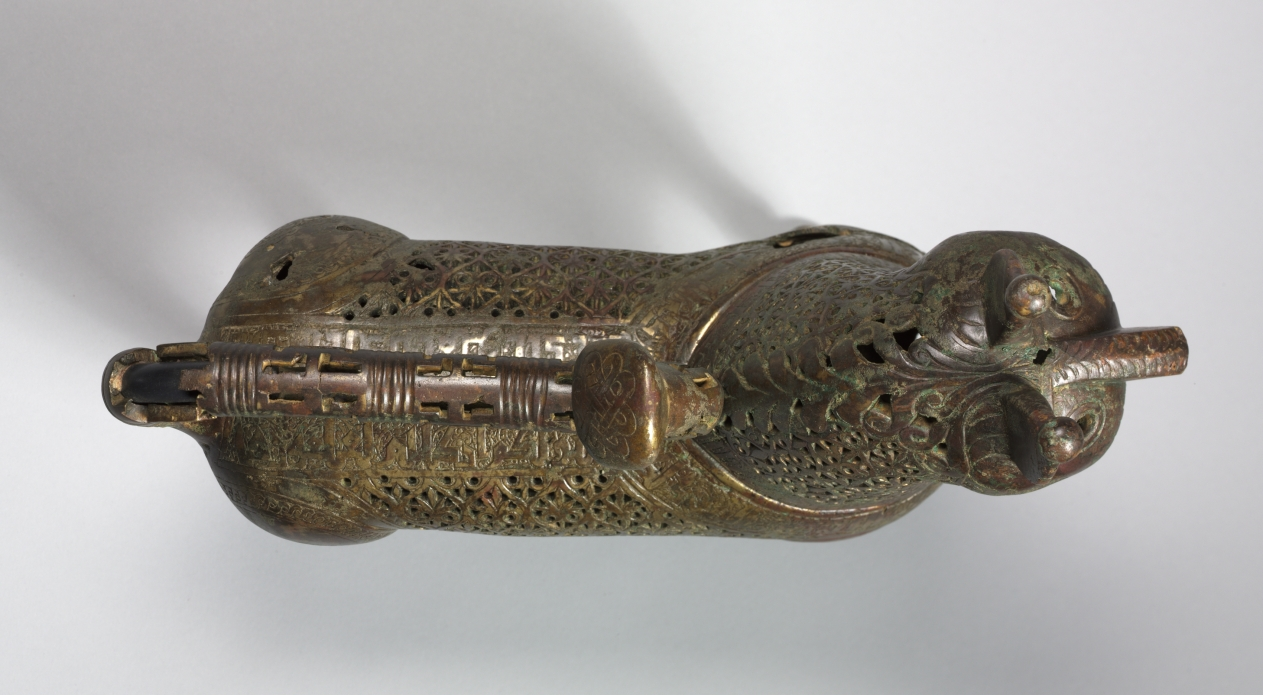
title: Feline Incense Burner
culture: Iran, Khurasan, Seljuq period of Iran (1037–1194)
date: 1150–1200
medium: Copper alloy, cast, engraved, chased, and pierced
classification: Metalwork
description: In Iran during the 1000s and 1100s, vessels in the shape of animals gained popularity, especially as incense burners. Felines were favored in Persian art and this piece may represent a caracal, a type of lynx. The head of the creature was cast separately and is removable to fill its body with hot coals and incense. Qur’anic verses on the neck and spine remind worshippers to set work aside, attend prayer, and then disperse to seek God’s bounty. The diffusion of perfumed smoke through the burner’s pierced palmette design may have served as a sensorial reminder of this teaching.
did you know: Arabic inscriptions in Kufic script against a background of scrolling arabesques run along the back and neck of the feline form.